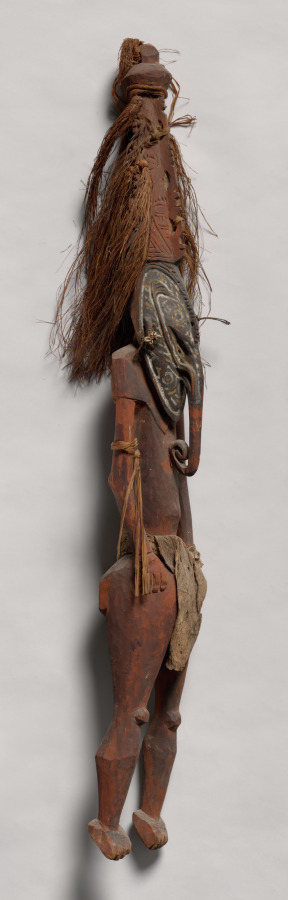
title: Ancestral Figure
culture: Melanesia, Papua New Guinea, Sepik River region, 19th century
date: 1800s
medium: painted wood with fiber and tapa cloth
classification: Sculpture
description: In the Sepik River region, village social and ceremonial life centers on the men's house. Ritual objects such as slit gongs, orators' stools, and flutes are stored there; the most sacred objects are kept hidden from women and children. Carved wooden figures, which probably represent ancestors, were preserved in the men's houses.